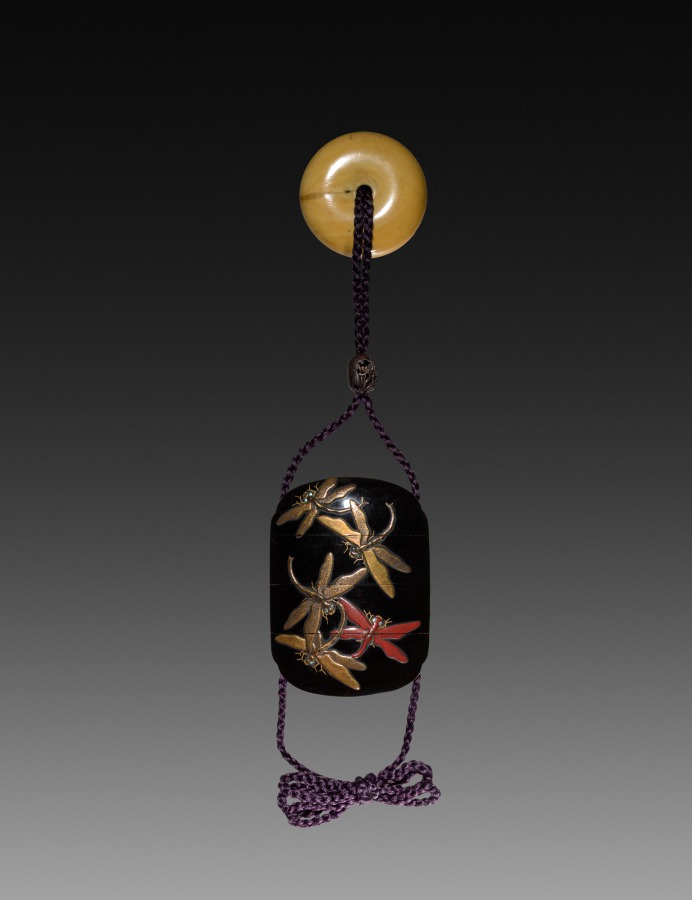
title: Inro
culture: Japan, Edo period (1615–1868)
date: 1615–1868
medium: lacquer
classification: Lacquer